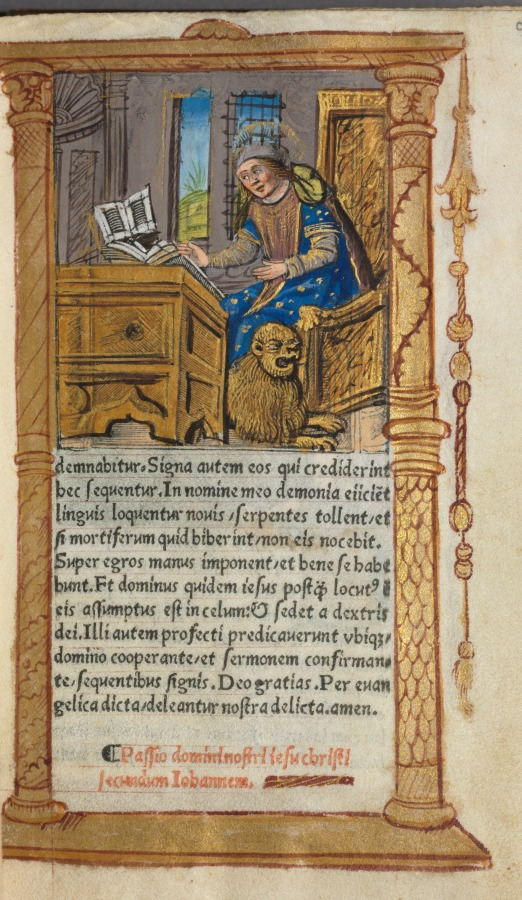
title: Printed Book of Hours (Use of Rome): fol. 20r, St. Mark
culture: France, Paris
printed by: Guillaume Le Rouge (French, Paris, active 1493–1517)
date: 1510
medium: 112 Printed folios on parchment, bound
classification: Bound Volume